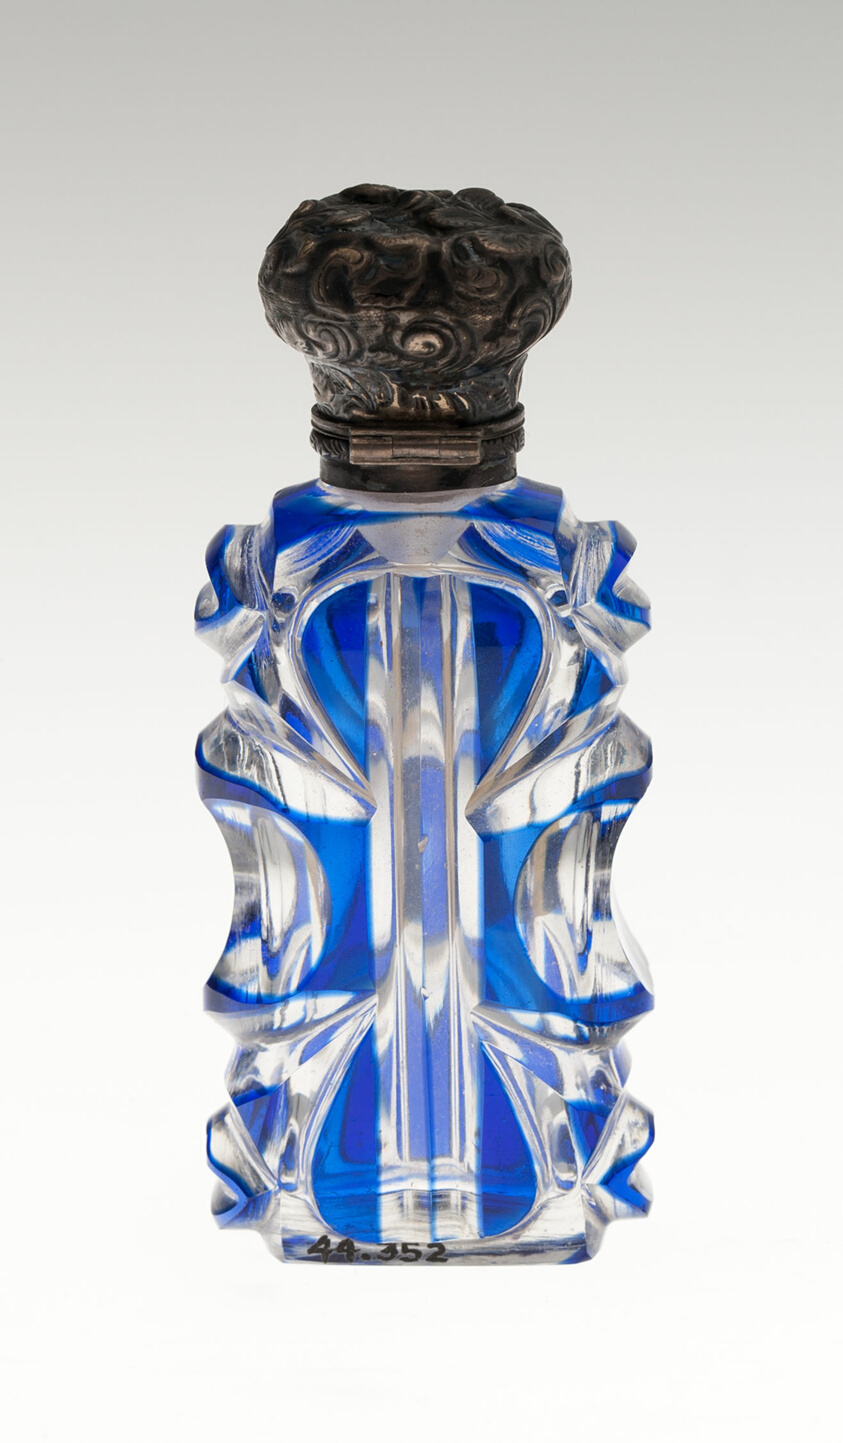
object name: Glass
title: Scent Bottle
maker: Bohemia, Czech Republic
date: c. 1840/50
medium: Glass; cut and colored with metal mounts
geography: Bohemia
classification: glass; european decorative arts